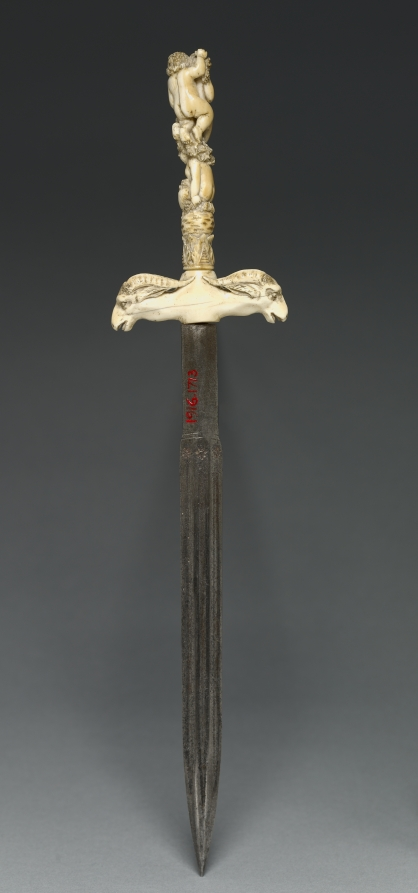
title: Dagger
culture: Italy, late 17th Century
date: late 1600s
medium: steel and ivory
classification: Arms and Armor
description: The carved grip of this dagger depicts the female followers of Bacchus, the Roman god of wine.